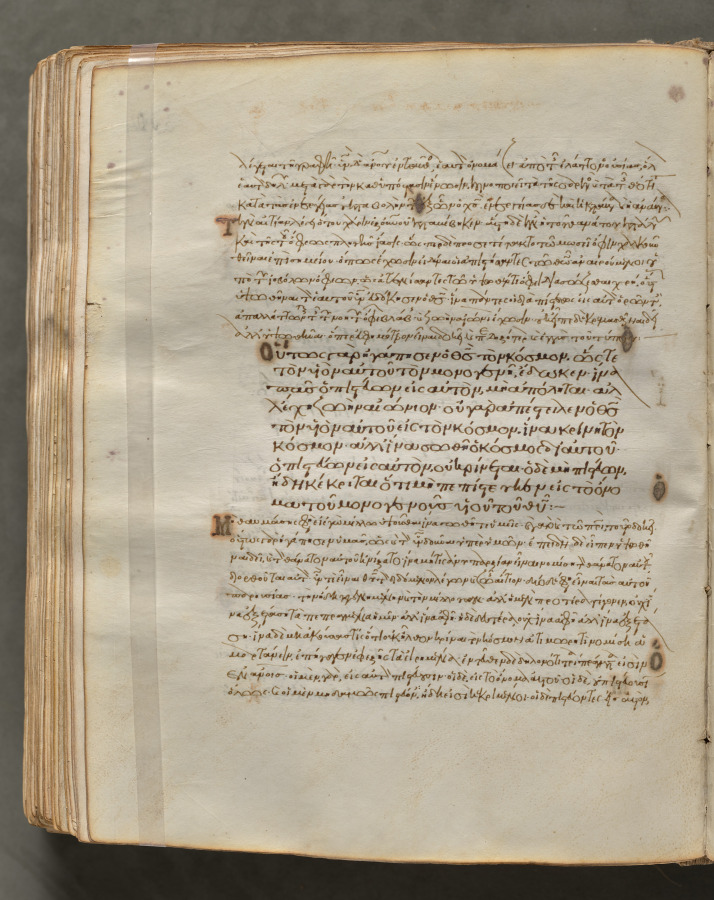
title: Text, folio 334 (verso), from a Gospel Book with Commentaries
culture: Byzantium, Constantinople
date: c. 1000–1100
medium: ink, tempera, and gold on vellum; leather binding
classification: Bound Volume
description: Each of the four gospels in this book opens on a page with brilliantly illuminated borders depicting the author of the text as well as birds—principally peacocks, symbols of the immortality of the soul—and fountains, representing the fountain of life and the salvation of the soul. This volume consists of 428 leaves with texts in Greek. Its level of sophistication suggests that it was probably written and decorated in a monastery in Constantinople.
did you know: Gospel books were carried in procession through Byzantine churches.